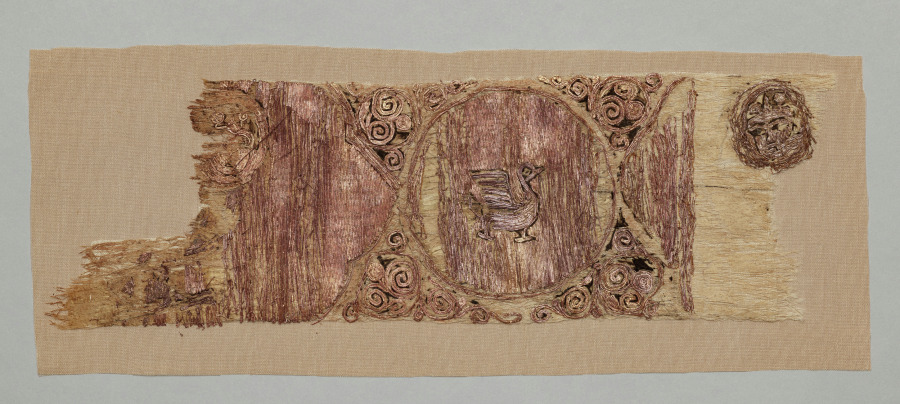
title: Fragment of an Embroidery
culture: Iran or Iraq, Seljuk period, 12th century A.D.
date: 1100s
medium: embroidery in silk and gold filé on mulham tabby ground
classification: Embroidery